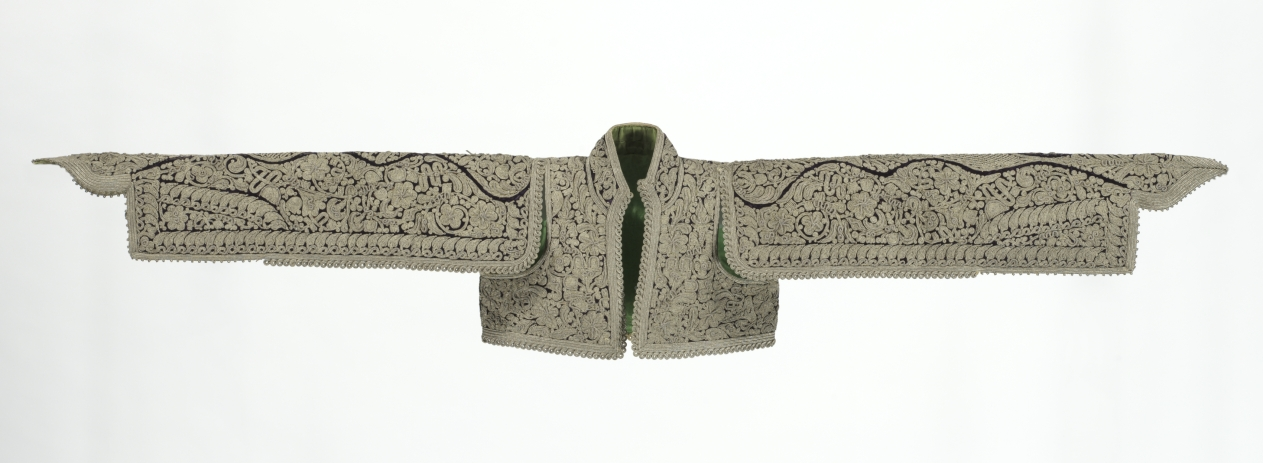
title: Jacket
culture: Macedonia or Albania, 19th century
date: c. 1800s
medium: velvet; metallic embroidery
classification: Garment